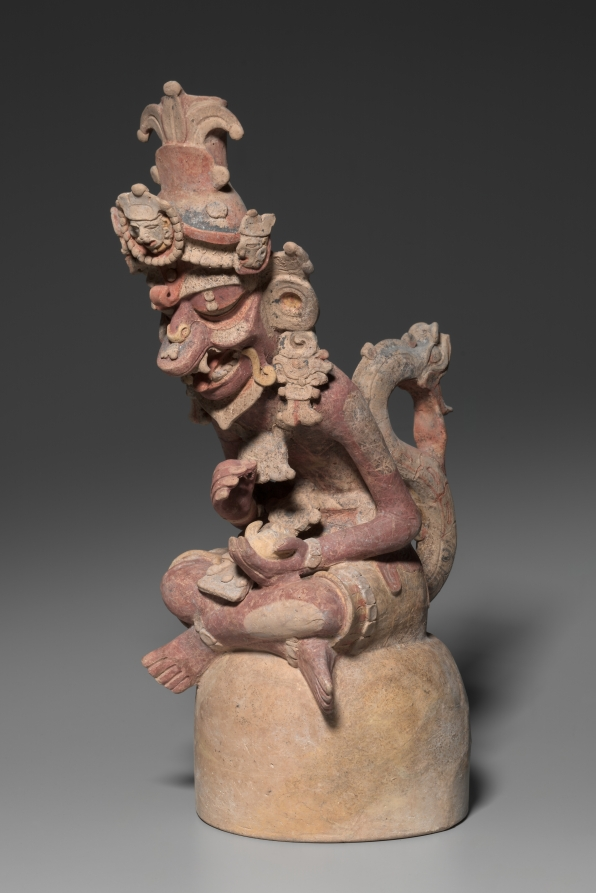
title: Artisan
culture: Guatemala, Petén region, Maya style (250-900), Maya style (250-900)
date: 250–600 CE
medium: earthenware with colored slips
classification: Sculpture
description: These figures represent the supernatural patrons of the visual arts and writing: the brothers Hun Batz and Hun Chuen ("One Monkey" and "One Artisan"). The two were refined artists but also bullies who tormented their younger brothers, who took revenge by transforming their elders into monkeys. Many Maya representations of the painter-scribes immortalize this fate by depicting the pair with both simian and human features, as here. The brothers are shown engaged in artistic or scribal pursuits. Sitting on high-domed bases that may have served as the lids of incense or offering bowls, each apparently once grasped a tool in his upper hand-for instance, a paint brush or a stylus for writing. In the lower hand, one cradles a small mask and the other, a piece of bark that likely refers to the beaten bark from which the Maya made books.